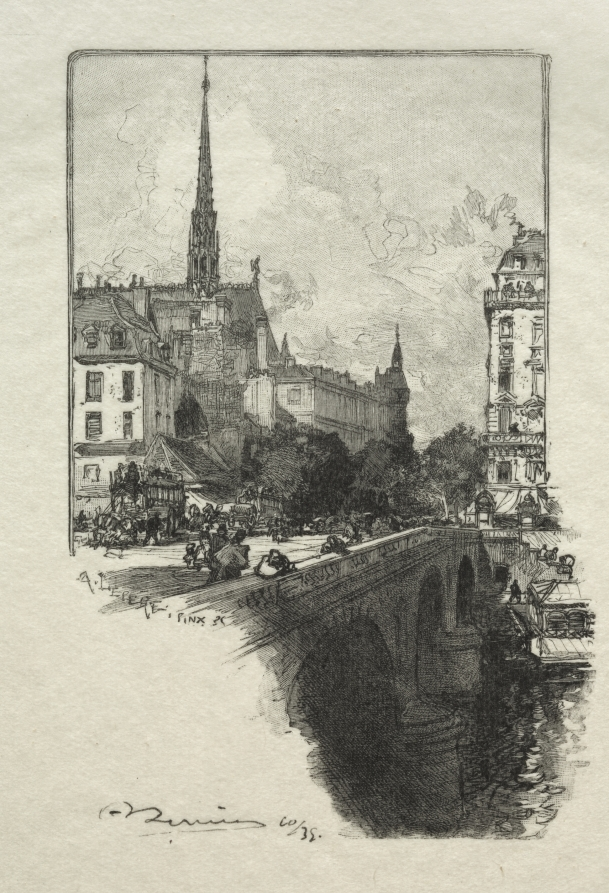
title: Le Pont St. Michel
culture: France, 19th century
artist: Auguste Louis Lepère (French, 1849–1918)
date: 1890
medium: wood engraving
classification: Print